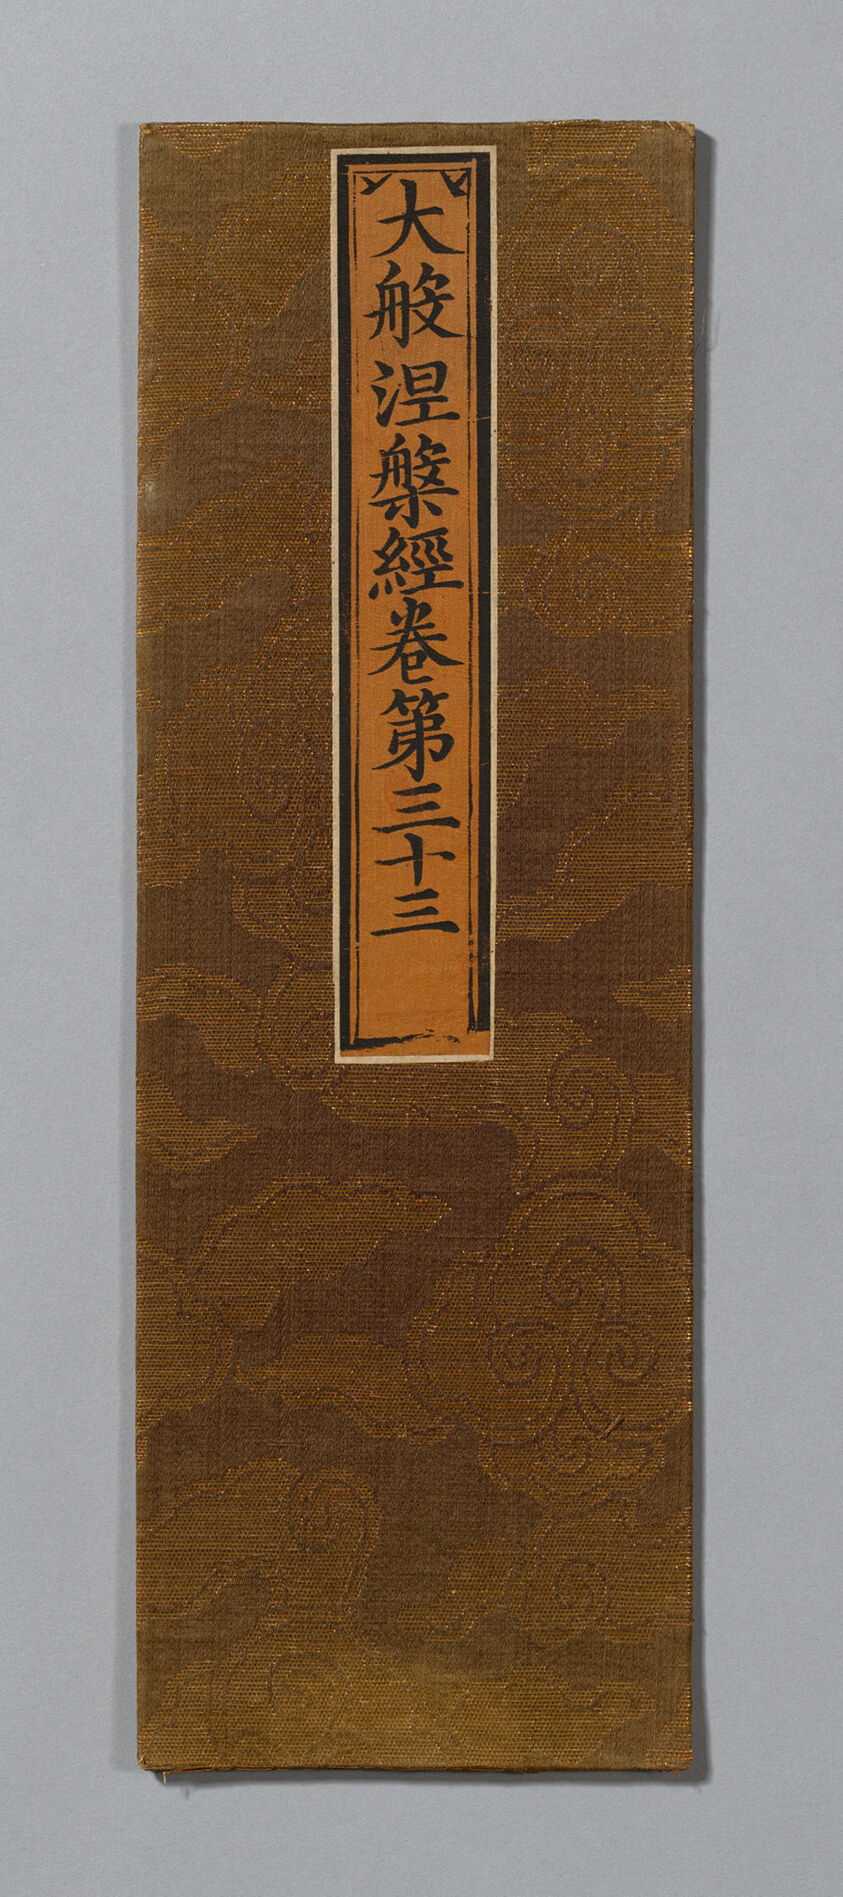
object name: Textile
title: Sutra Cover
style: ming, Chinese (culture or style), East Asian, asian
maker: China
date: Ming dynasty (1368–1644), c. 1590's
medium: Silk and gold-leaf-over-lacquered-paper strips, satin weave with patterning wefts; wrapped over cardboard and partially backed with paper; applied label of silk, plain weave; with inscribed title painted and/or printed with ink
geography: China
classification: textile; weaving